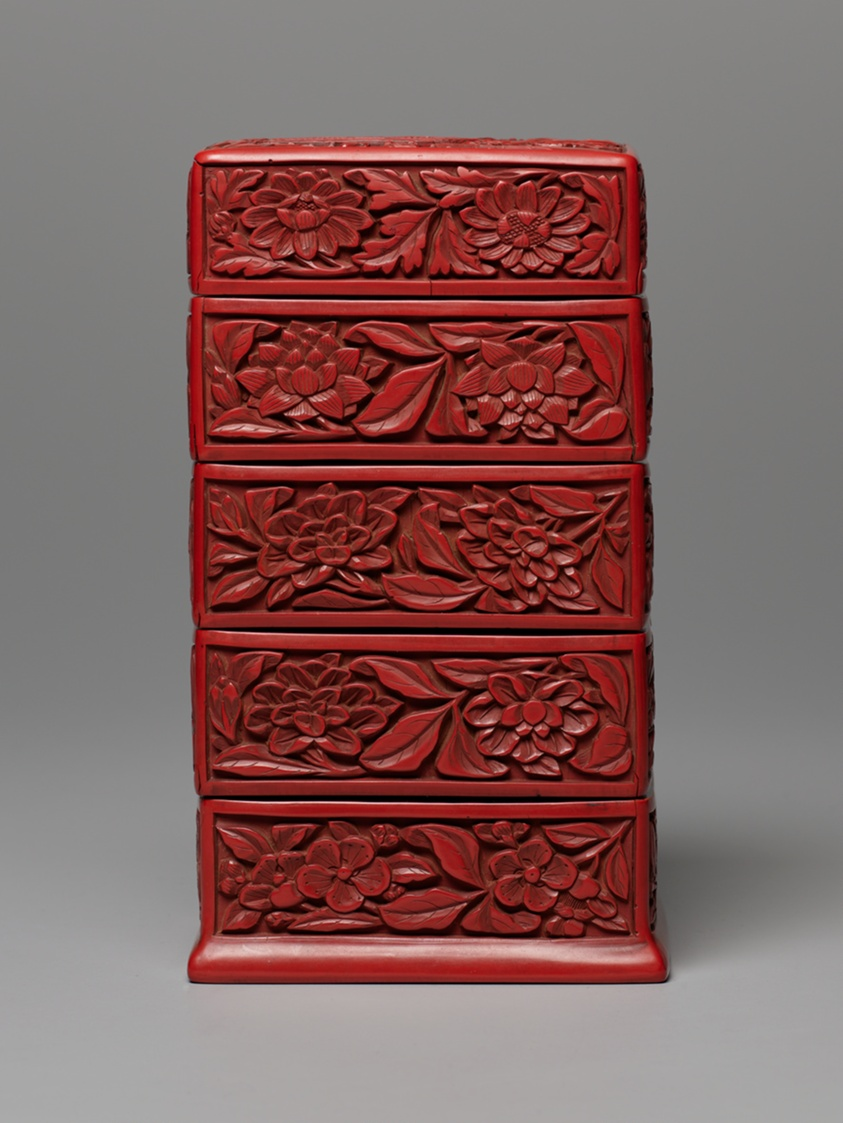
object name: Decorative Arts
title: Four-Tiered Square Box and Cover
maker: China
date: Ming dynasty (1368-1644), 16th century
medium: Carved cinnabar lacquer and black lacquer (interior)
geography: China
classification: lacquer